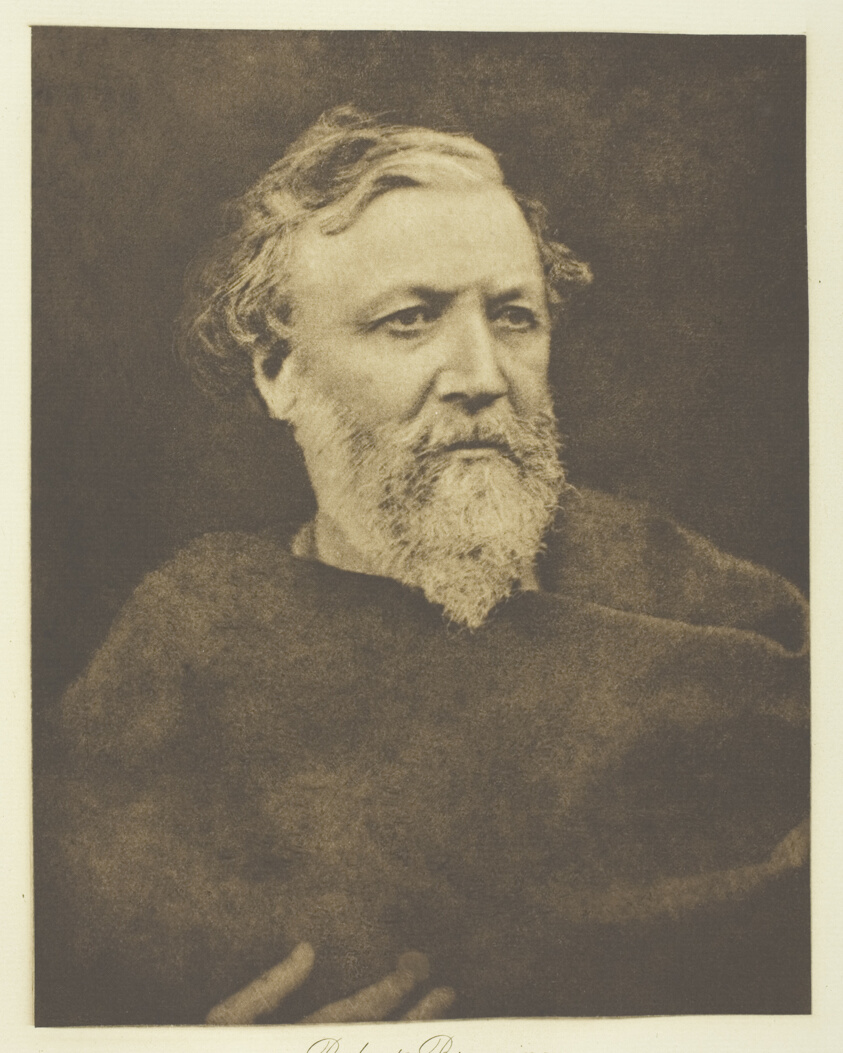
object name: Photograph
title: Robert Browning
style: 19th century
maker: Julia Margaret Cameron (English, 1815–1879)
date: 1865, printed c. 1893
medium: Photogravure, plate 9 from the album "Lord Tennyson and his Friends" (1893)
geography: England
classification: photogravure; photomechanical process; photography; photograph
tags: Collected by Hugh Edwards, Lord Tennyson and His Friends